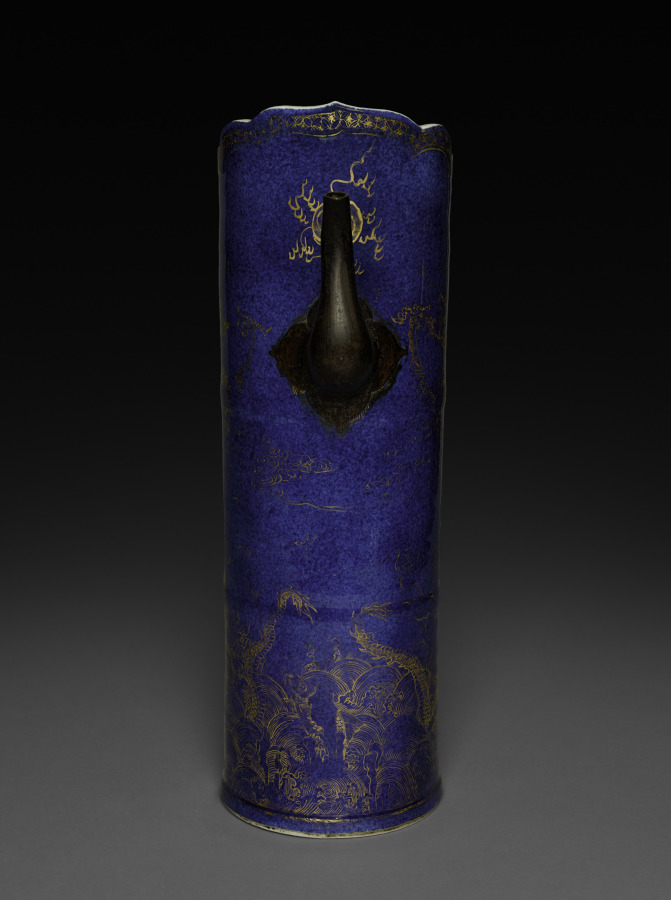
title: Cylindrical Ewer with Dragons Pursuing Flaming Jewel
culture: China, Jiangxi province, Jingdezhen kilns, Qing dynasty (1644-1911), Kangxi reign (1662-1722)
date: 1662–1722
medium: porcelain with powder blue glaze painted with gold decoration and supplied with metal fittings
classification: Ceramic